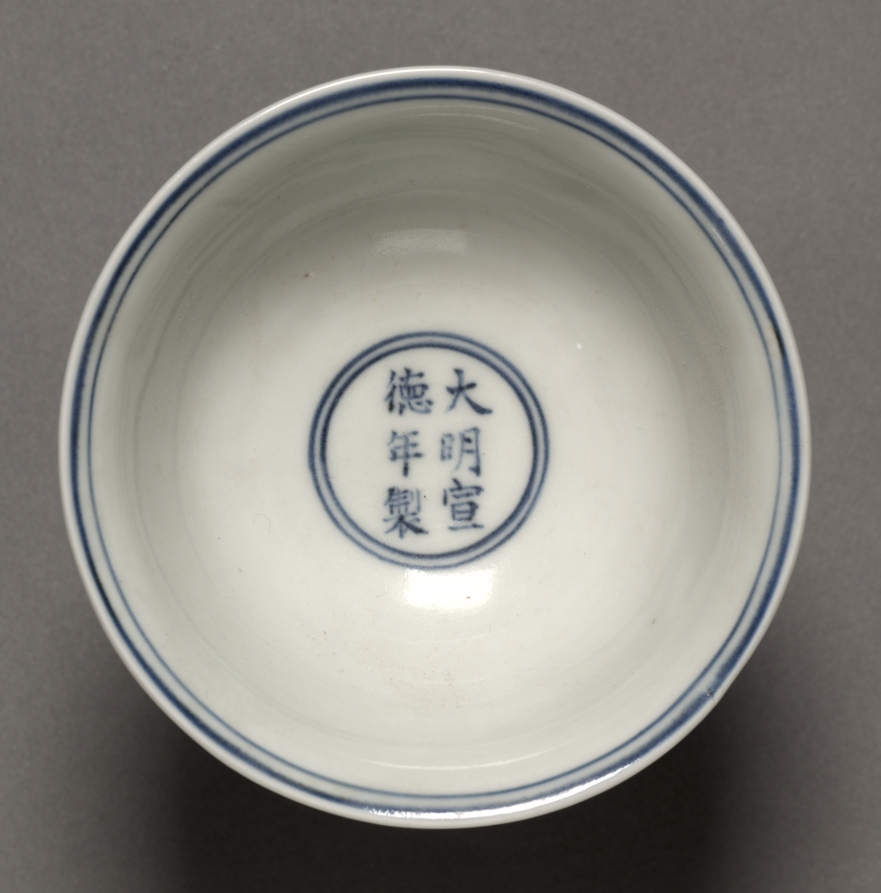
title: Stem Cup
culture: China, Jiangxi province, Jingdezhen, Ming dynasty (1368-1644), Xuande mark and period (1426-1435)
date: 1426–35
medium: porcelain with reversed underglaze blue and incised decoration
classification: Ceramic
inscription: 大明宣德年製